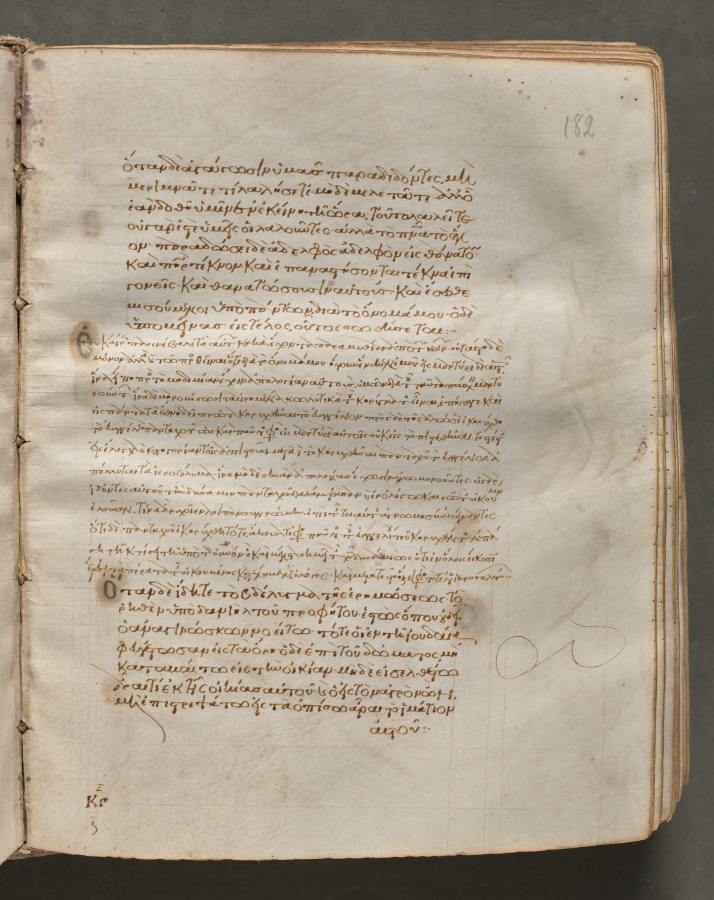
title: Text, folio 182 (recto), from a Gospel Book with Commentaries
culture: Byzantium, Constantinople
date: c. 1000–1100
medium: ink, tempera, and gold on vellum; leather binding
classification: Bound Volume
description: Each of the four gospels in this book opens on a page with brilliantly illuminated borders depicting the author of the text as well as birds-principally peacocks, symbols of the immortality of the soul-and fountains, representing the fountain of life and the salvation of the soul. This volume consists of 428 leaves with texts in Greek. Its level of sophistication suggests that it was probably written and decorated in a monastery in Constantinople.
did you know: Gospel Books were carried in procession through Byzantine churches.